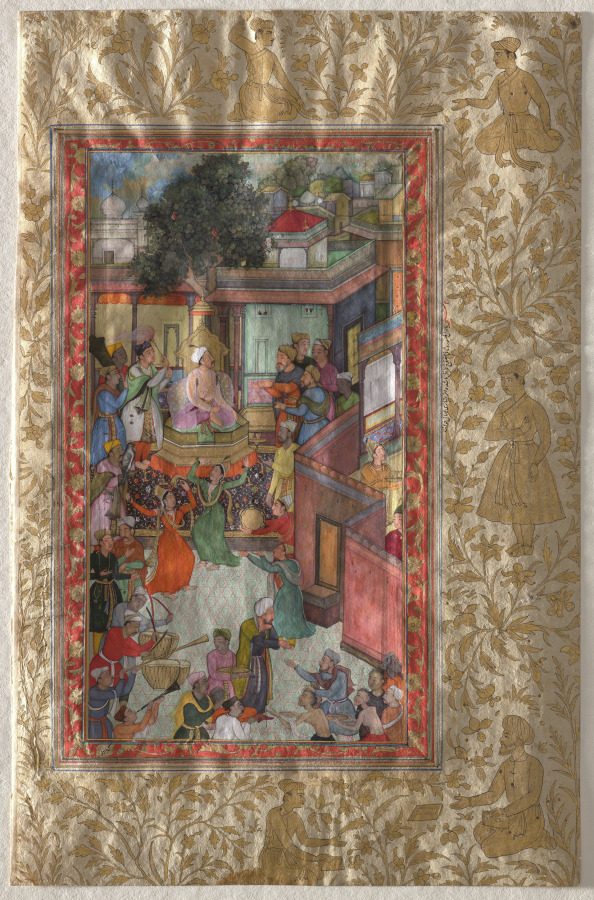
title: Circumcision ceremony for Akbar’s sons, painting 126 from an Akbar-nama (Book of Akbar) of Abu’l Fazl (Indian, 1551–1602)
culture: Mughal India, court of Akbar (reigned 1556–1605)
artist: attributed to Dharam Das (Indian, active c. 1580–1605)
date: c. 1602–3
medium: gum tempera, ink, and gold on paper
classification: Painting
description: This page is from a copy of the biography of Akbar that was completed not long before his death in 1605. It depicts him much younger, during the festivities held on October 22, 1573, in his newly built capital city of Fatehpur Sikri, near Agra, on the occasion of the circumcision ceremony for his three young sons. Dancers in Chaghatai Turkish dress perform as Akbar’s weight in gold is being distributed to the poor. Akbar wears a simple white tunic, or jama, stained at the armpits by aromatic musk. A curved dagger in a red velvet sheath is tucked into his golden sash, and he is crowned with a white crested turban.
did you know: An attendant strokes Akbar’s hunting falcon, perched on a glove.